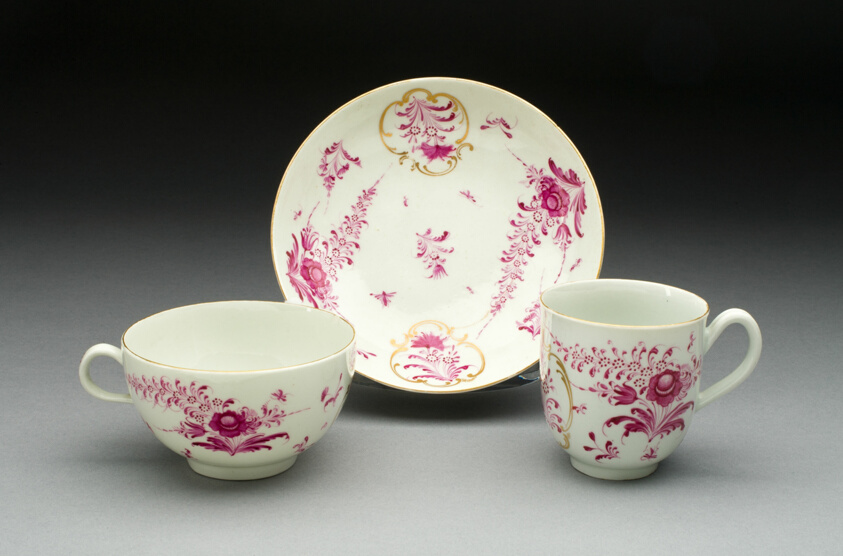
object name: Ceramics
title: Teacup, Coffee Cup, and Saucer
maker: Worcester Porcelain Factory (Warmstry House Period, 1751–1783); Worcester, England, founded 1751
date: c. 1770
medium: Soft-paste porcelain with purple enamel and gilding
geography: Worcester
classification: drinking vessel; teaware; porcelain; european decorative arts; ceramics